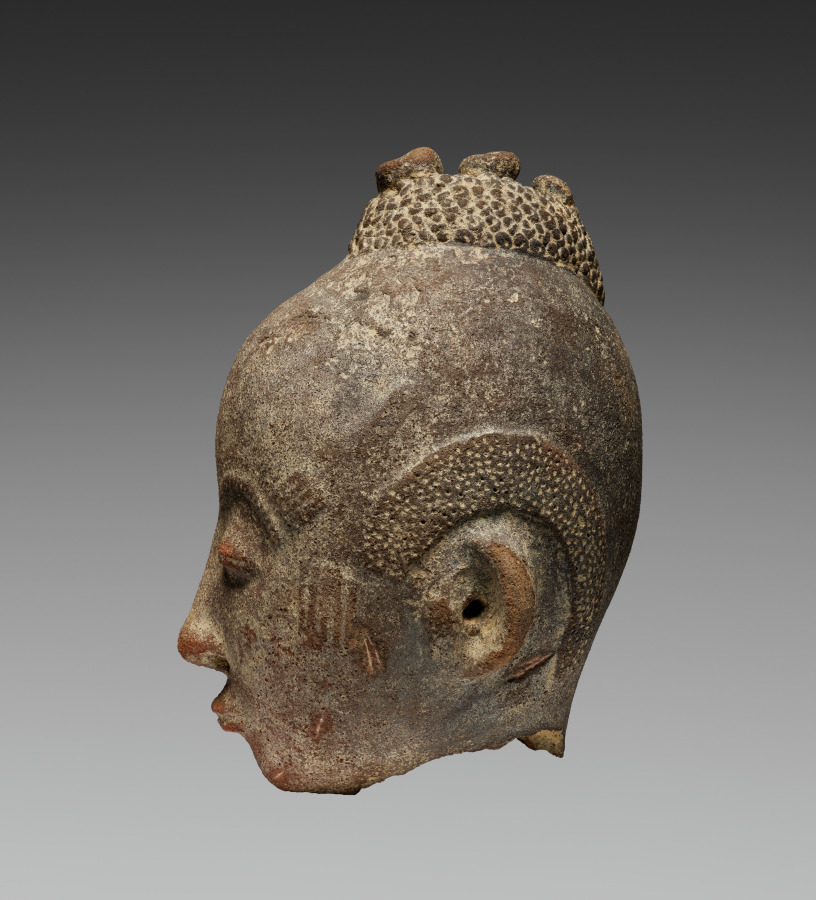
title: Memorial head (nsodie)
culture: Ghana, Akan-style sculpture, unknown female ceramicist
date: late 1600s–early 1700s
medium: Terracotta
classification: Sculpture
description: This is an idealized portrait of an Akan royal. The Akan states formed in West Africa around the 1400s. Akan royal family members commissioned terracotta portraits like this from female artists during someone’s life. Following their death and burial, the family placed these sculptures in a sacred grove. The woman who sculpted this head over 300 years ago worked from memory, without sketches. The resulting sculpture combined idealized physical qualities of elite figures with individual details. The hairstyle and skin color of this portrait reflect its subject’s individuality. In contrast, his calm expression reflects the desired “cool composure” of elites.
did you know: The woman who sculpted this head did so without making a sketch, working from her memory of the subject.